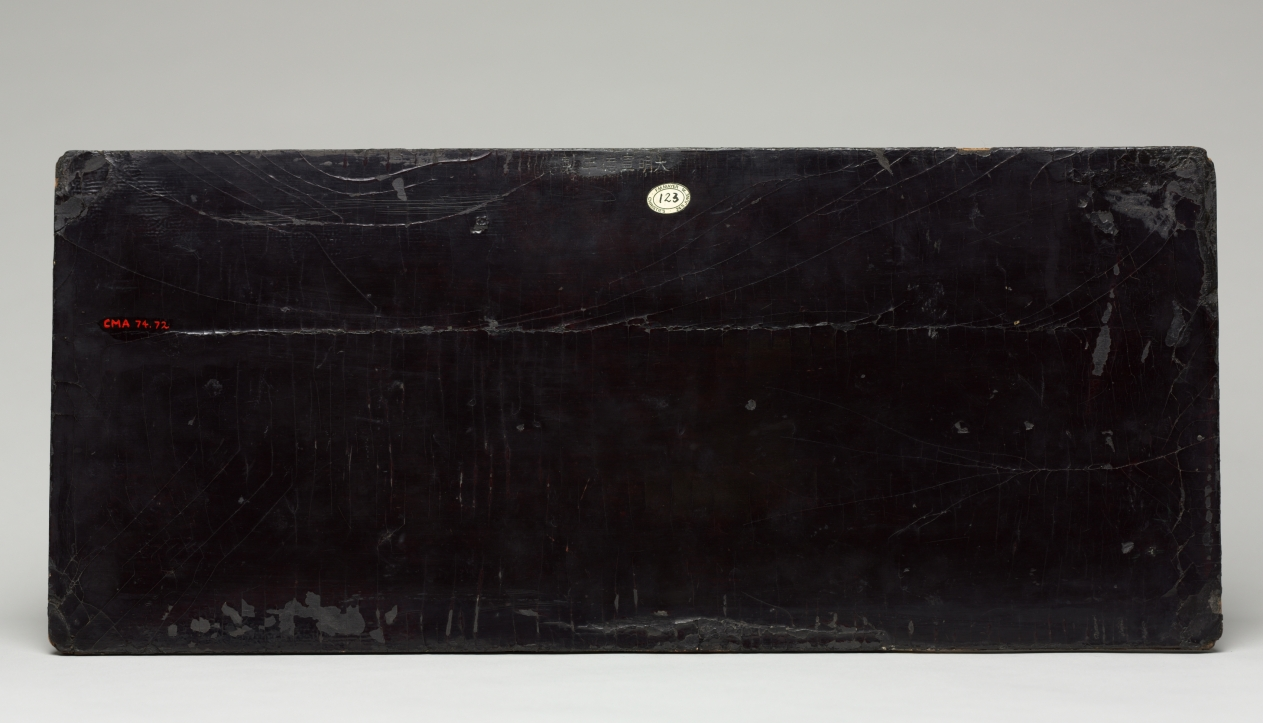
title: Gathering at Lanting (Orchid Pavilion)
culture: China, Ming dynasty (1368–1644)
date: 1400s–1500s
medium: Carved cinnabar-red lacquer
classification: Lacquer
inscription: 大明宣德年製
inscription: F. M. Mayer Christie's 24/5 June '74. 123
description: This lacquer panel, perhaps part of a piece of furniture, depicts the Gathering at Lanting in 353 CE that took place during the Spring Purification Festival, a day spent traditionally outside in nature. Here, cups of wine are set afloat on a winding stream as part of a poetry competition among the attendants. By the Ming dynasty the painting theme Gathering at Lanting also appeared on lacquer, jade, and porcelain. The main figure and central motif, Calligrapher Wang Xizhi Watching Geese, has been moved toward the upper register of the composition.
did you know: A stylized wave pattern represents water; land areas are covered in an overall diamond pattern.